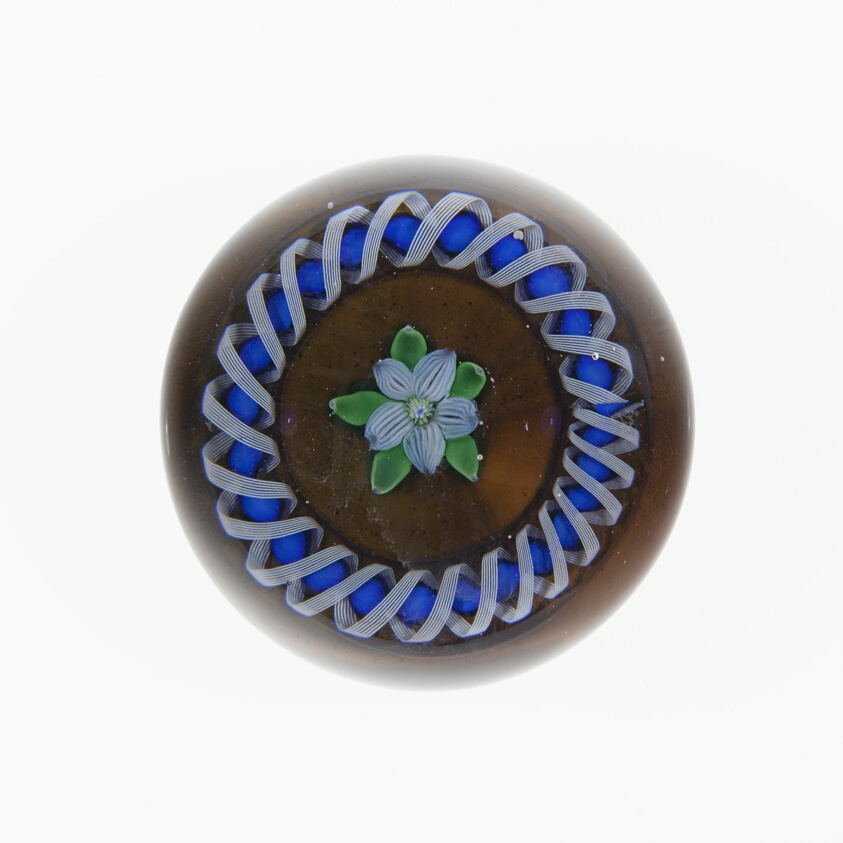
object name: Glass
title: Paperweight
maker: Saint-Louis Glassworks (Cristalleries de Saint-Louis); Lorraine, France, founded 1586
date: c. 1845/60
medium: Glass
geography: Saint-Louis-lès-Bitche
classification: paperweight; glass